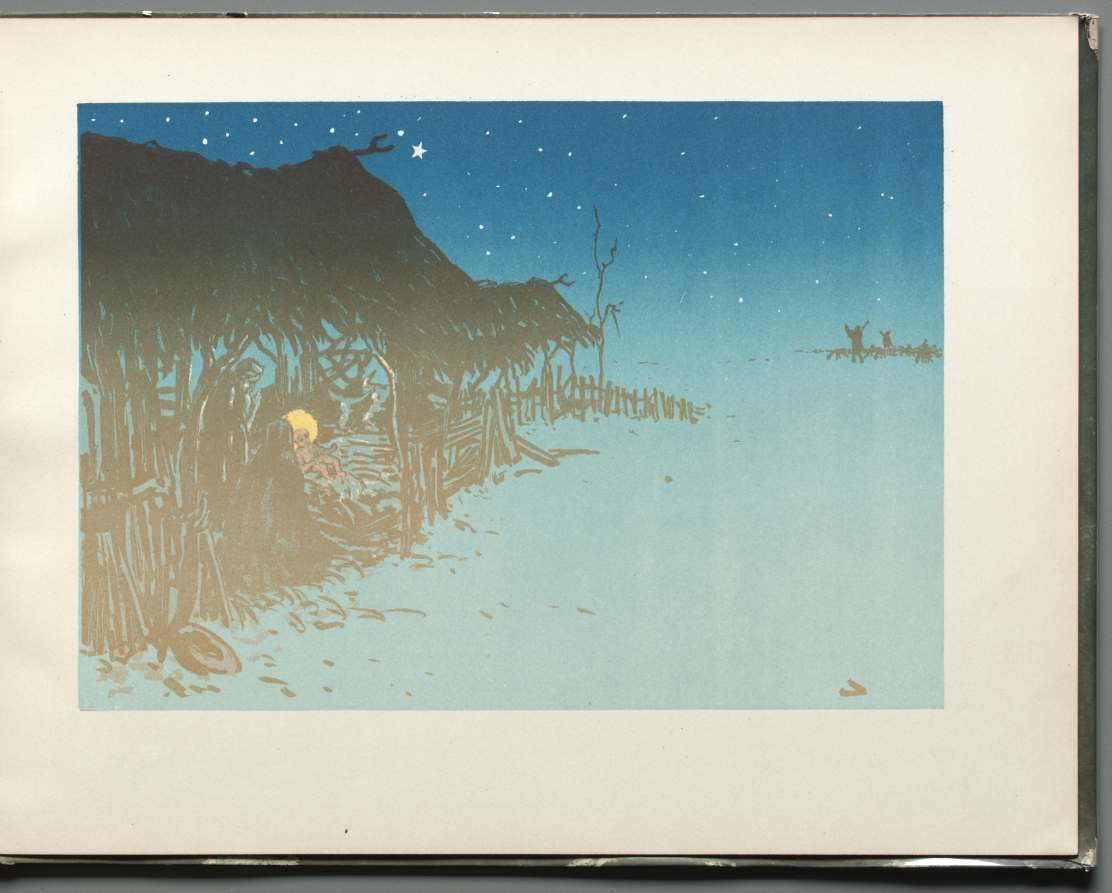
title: The Progress of the Stars: La Crèche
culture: France, 19th century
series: Bound Volume illustrating the poetry and music of Georges Fragerolle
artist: Henri Rivière (French, 1864–1951)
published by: C. Marpon & Flammarion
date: 1890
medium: 18 color lithographs in a Bound Volume illustrating the poetry and music of Georges Fragerolle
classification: Bound Volume